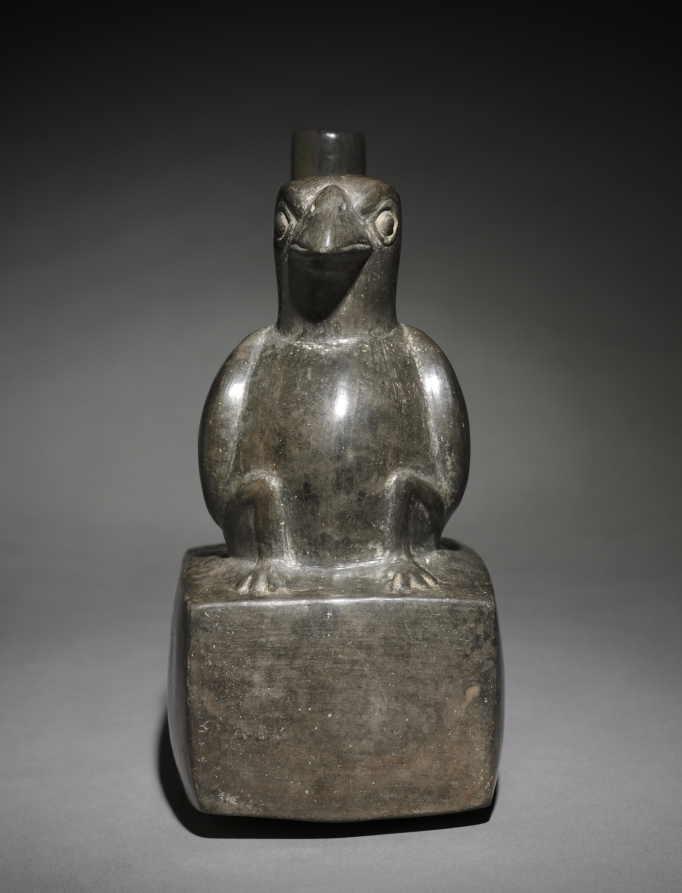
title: Darkware Vessel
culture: Peru, North Coast, Chimú style (900-1470)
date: 900–1470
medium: black ware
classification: Ceramic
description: Under the Chimú, ceramic seems to have been a less important artistic medium than for earlier north coast cultures. Accordingly, ceramics were mass produced with molds and, rather than bearing painted scenes, often have an overall dark surface achieved by firing in a smoky atmosphere.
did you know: Chimú potters fired their vessels in a reduced-oxygen atmosphere to achieve a uniform black surface.